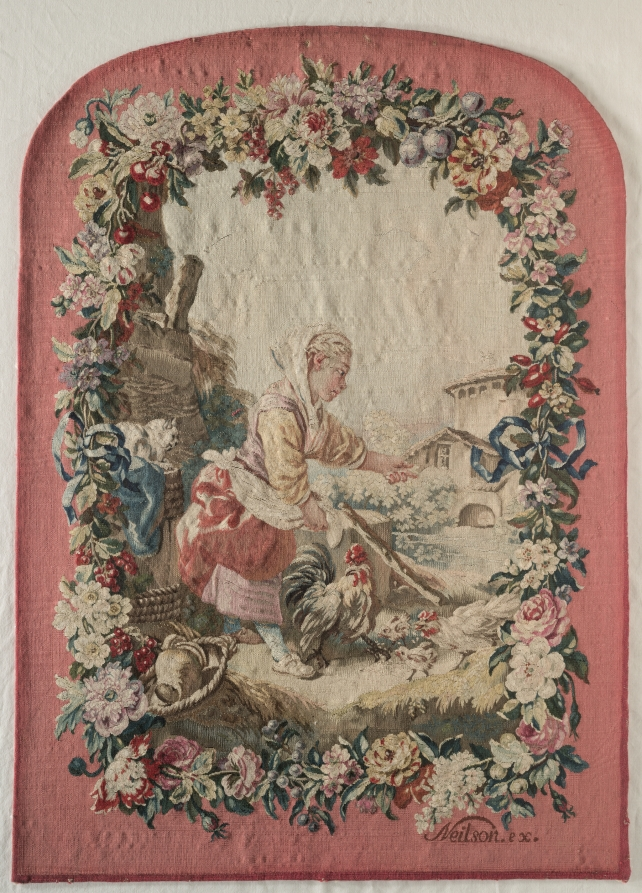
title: Fire Screen Panel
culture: France, 18th century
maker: Jacques Neilson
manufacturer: Gobelins Manufactory (France, Paris, est. 1662)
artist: after a design by Jean-Baptiste Marie Hüet (French, 1745–1811)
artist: after a design by Maurice Jacques (French, 1712–1784)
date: c. 1775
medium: tapestry weave: silk and wool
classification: Textile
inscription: lower right: "Neilson. ex.."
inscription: Woven into textile: Neilson. ex.